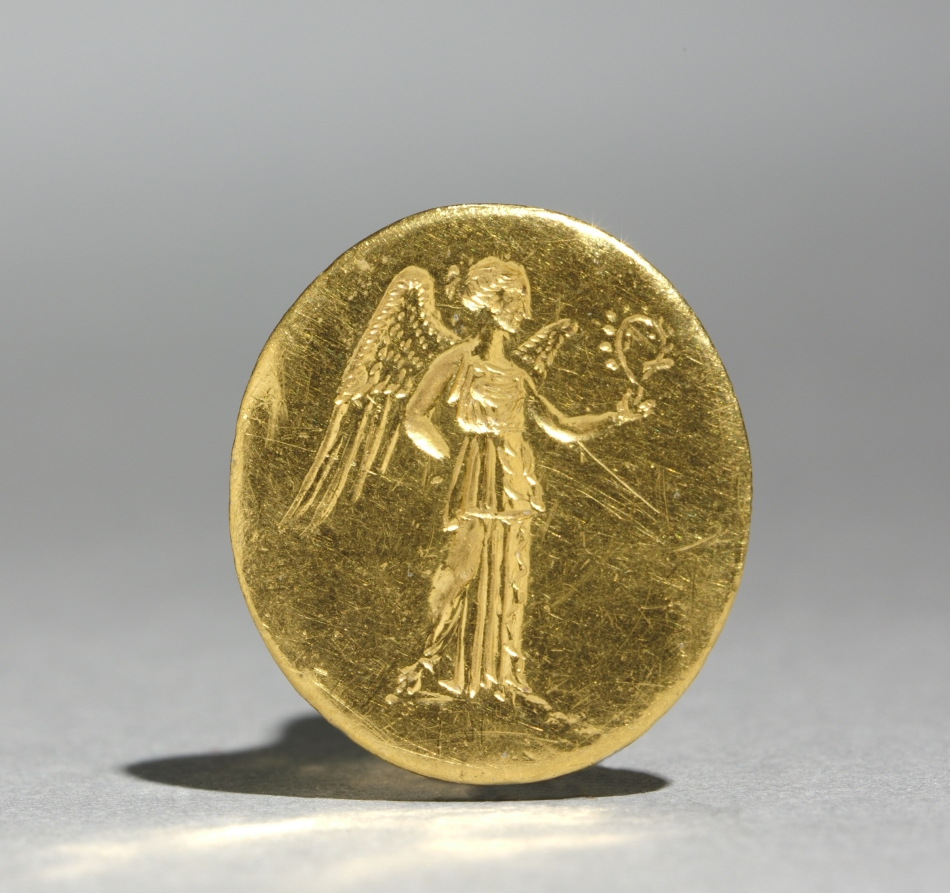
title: Finger Ring with Figure of Nike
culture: Greece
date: 300s BCE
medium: gold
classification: Jewelry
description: The figured carved on the upper portion of this gold ring represents Nike, the Greek goddess of victory. She faces right in contrapposto with one hand behind her back while the other, outstretched, displays a wreath. The goddess is exquisitely engraved, with separately modeled locks of hair and individual feathers on her wings. Engraved rings were worn both as jewelry and as personal signatures, since the engraved image could be pressed to create a seal.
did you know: The ancient Greek pronunciation of Nike is NEE-kay.